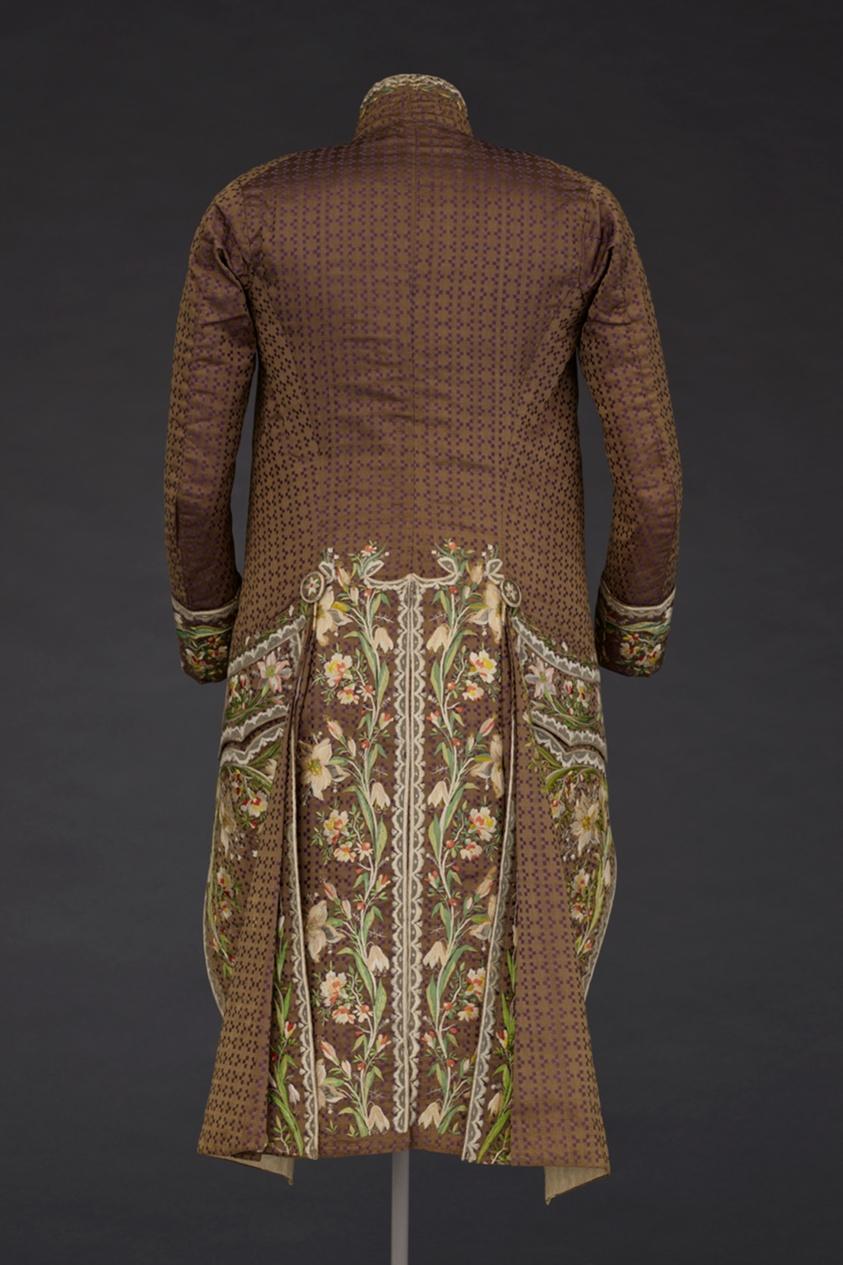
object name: Costume and Accessories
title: Man's Coat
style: 18th Century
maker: France, possibly Lyon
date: 1780s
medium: Silk, compound weave foundation; embroidered with silk threads in satin, stem and straight stitches; French knots, needle lace fillings, and slanted satin border block shading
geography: France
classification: textile; needlework (visual works); costume; dress (garment); clothing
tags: fashion, floral motifs, flowers